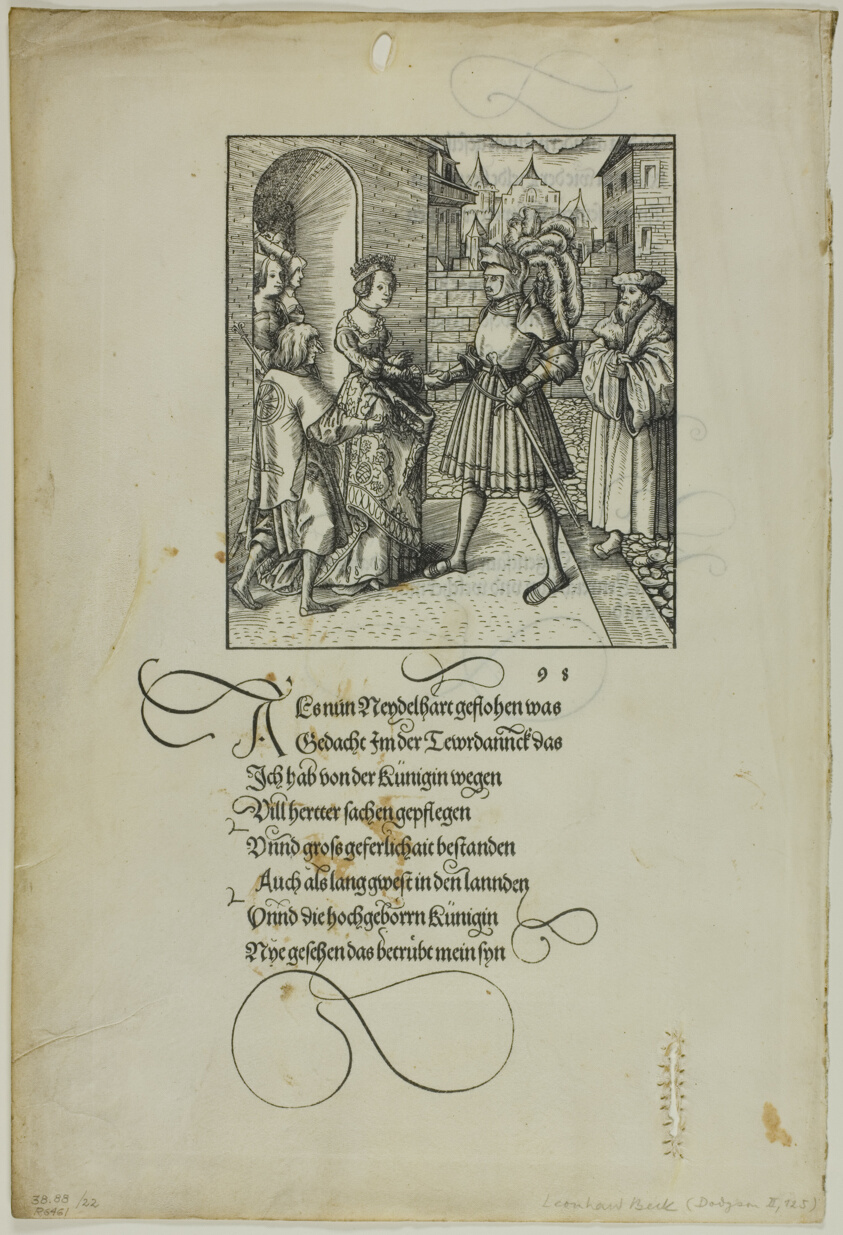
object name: Print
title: Theuerdank Received by Ehrenreich, from Teuerdank, plate 22 from Woodcuts from Books of the XVI Century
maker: Leonhard Beck (German, c.1480-1542),; published by Johann Schonsperger the Elder (German, 1455-1521),; assembled by Max Geisberg (Swiss, 1875-1943)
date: 1517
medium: Woodcut in black on vellum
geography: Germany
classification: woodcut; print; prints and drawing